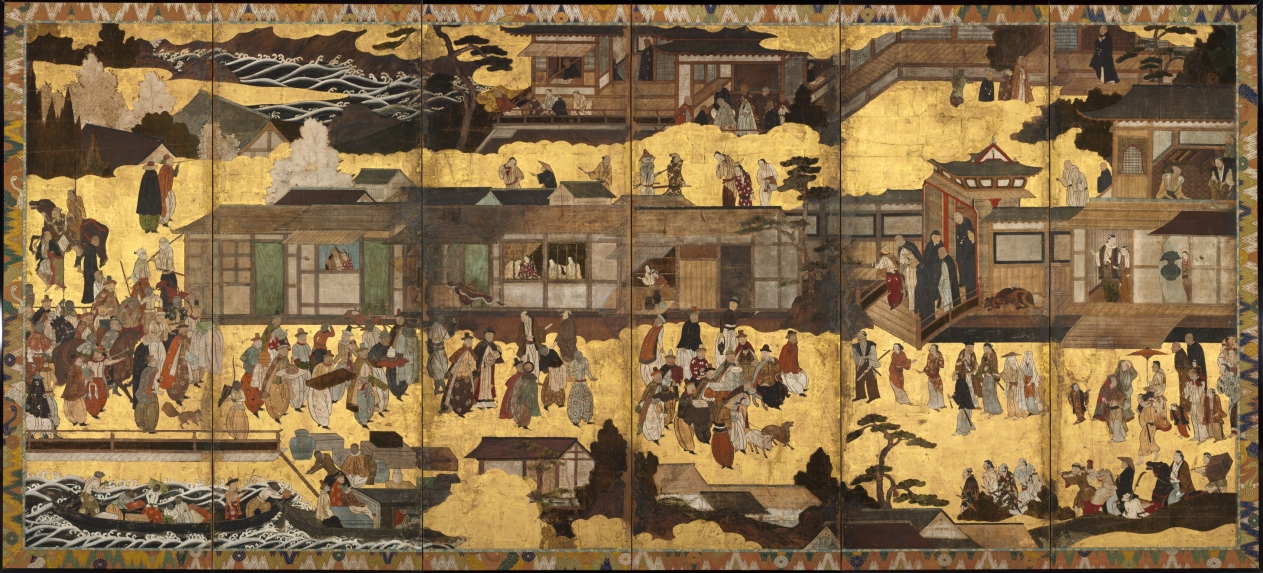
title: Arrival of the "Southern Barbarians"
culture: Japan, Momoyama period (1573–1615)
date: c. 1600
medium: One of a pair of six-panel folding screens; ink, color, and gold on paper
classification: Painting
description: This screen and its corresponding screen show Portuguese merchants arriving in Japan, having crossed the oceans in their large ship with a multinational crew. The Portuguese were known in Japan as the “Southern Barbarians” because they arrived from the south and their customs and manners were unfamiliar to the Japanese, who had not encountered anyone from Europe until their first appearance in 1543. In 1639, the Portuguese were forced out of Japan, mainly owing to internal difficulties caused by their Catholic missionaries, but they were a major conduit for both objects and ideas from Europe for nearly 100 years.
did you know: Europeans were called "Southern Barbarians" because their ships arrived in Japan from the south.